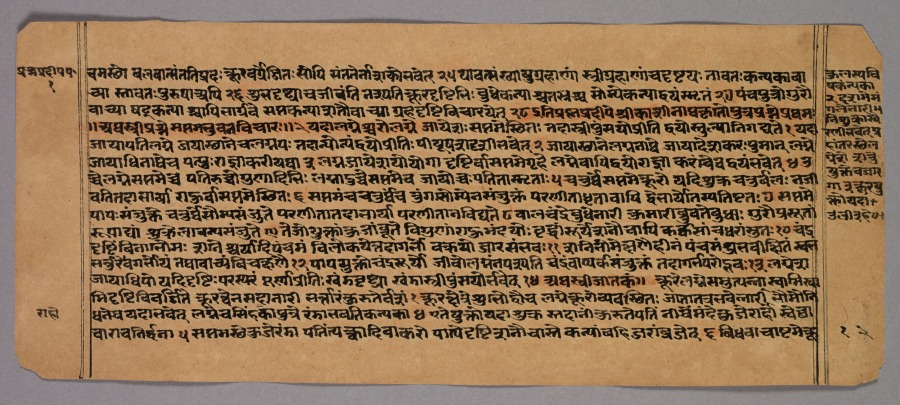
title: Page from the Prasnapradipa, a Hindu Astrology Text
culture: Western India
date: c. 1700s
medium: ink on paper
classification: Manuscript